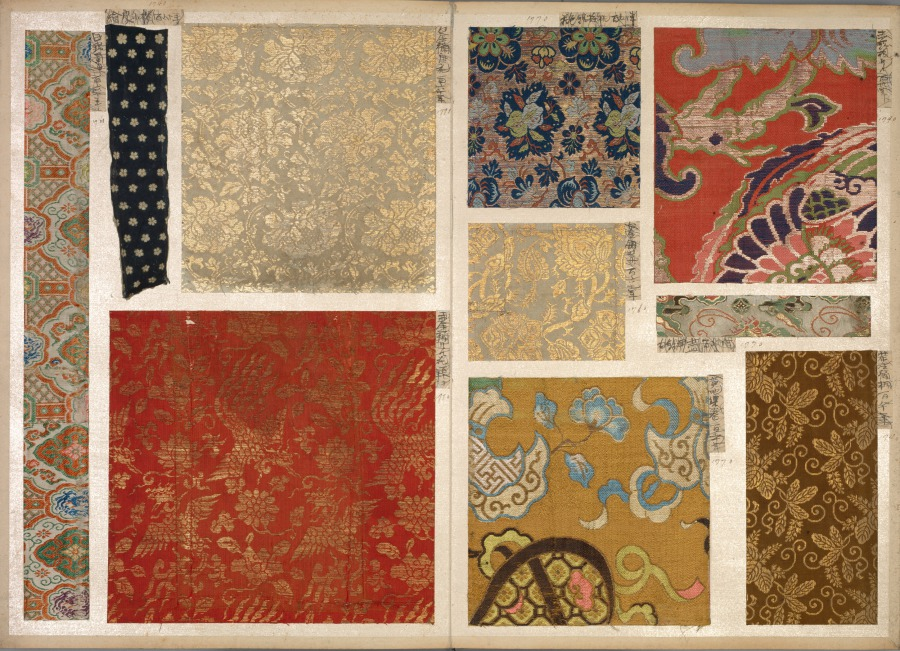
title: Album of Textile Samples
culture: Japan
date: 1790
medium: silk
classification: Textile